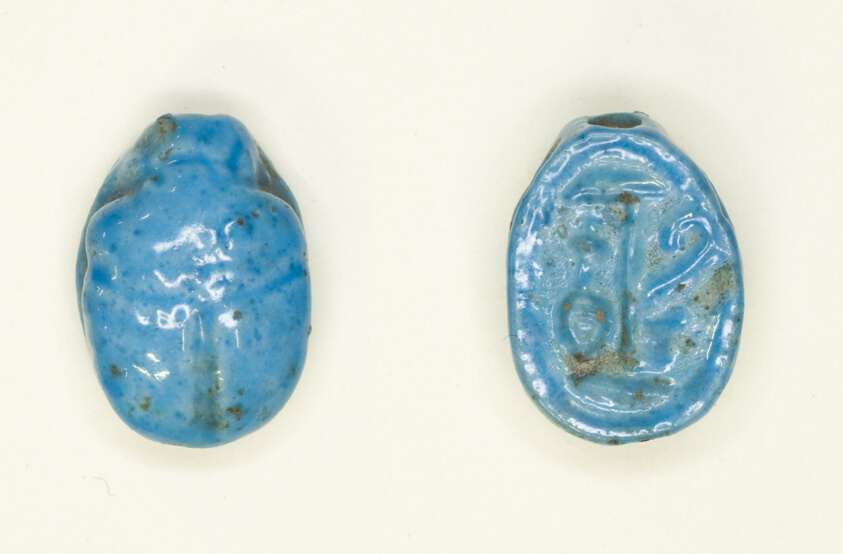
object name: Costume and Accessories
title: Scarab: Hieroglyphs (Red Crown, nfr- and nb-Signs: Trigramme of Amun)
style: new kingdom, nineteenth dynasty, eighteenth dynasty, ancient, egyptian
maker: Egyptian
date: New Kingdom, Dynasties 18–19 (about 1550–1186 BCE)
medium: Faience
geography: Egypt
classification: scarab; ancient art; costume; faïence (composite material)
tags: scarab beetle, insects, inscription, Hieroglyphs